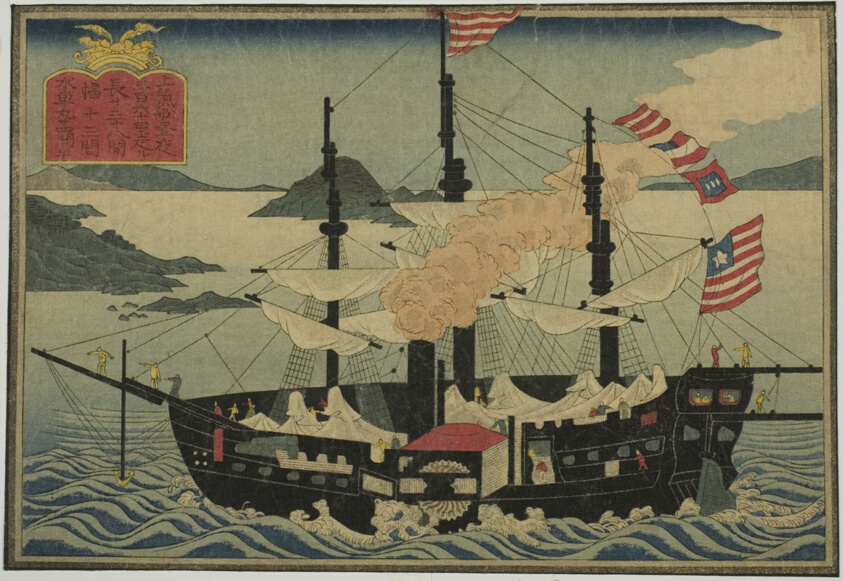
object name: Print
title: Steam Ship, from the set of eight Pictures of Foreign Ships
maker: Unknown Artist (Japanese, date unknown)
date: 1840s–1850s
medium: Color woodblock print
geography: Japan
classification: woodblock print; print; asian art